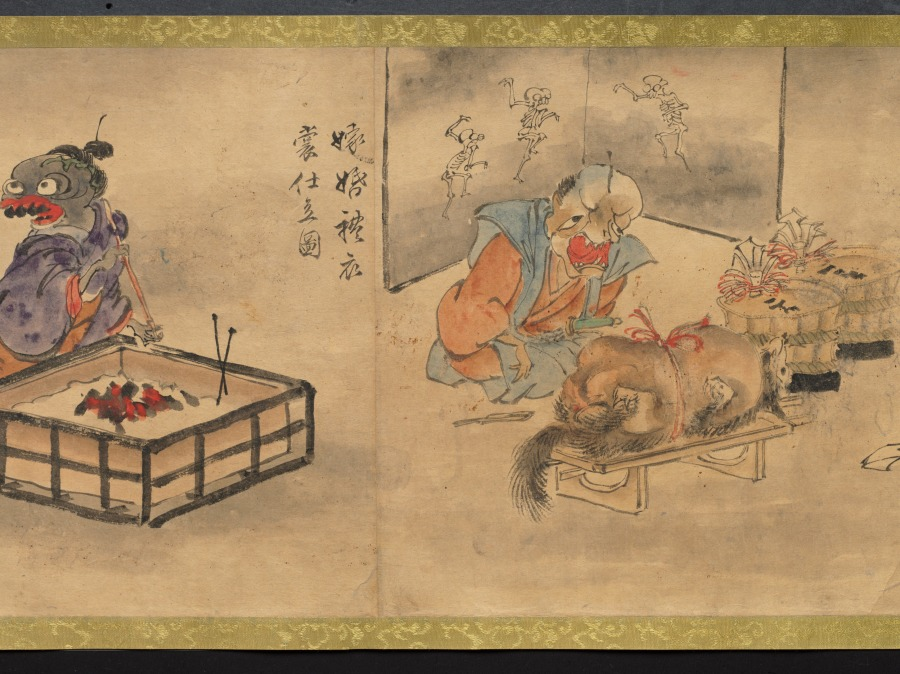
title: An Illustrated Marriage of Apparitions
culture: Japan, Edo period (1615–1868)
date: mid-1800s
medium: handscroll; ink and color on paper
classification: Painting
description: The matchmaking, engagement, wedding, and birth of the first child of two apparitions, or bakemono, literally "things that change," are illustrated in this whimsical, humorous handscroll. Japanese folklore abounds with such strange creatures, most famously represented in handscrolls featuring a procession of 100 supernatural monsters. Aside from a textual preface and cartouches indicating the content of the scenes, the tale is told visually. The artist and whereabouts of the original handscroll are unknown, but a number of other 19th-century copies by amateur painters exist in Japanese collections, attesting to its broad appeal.